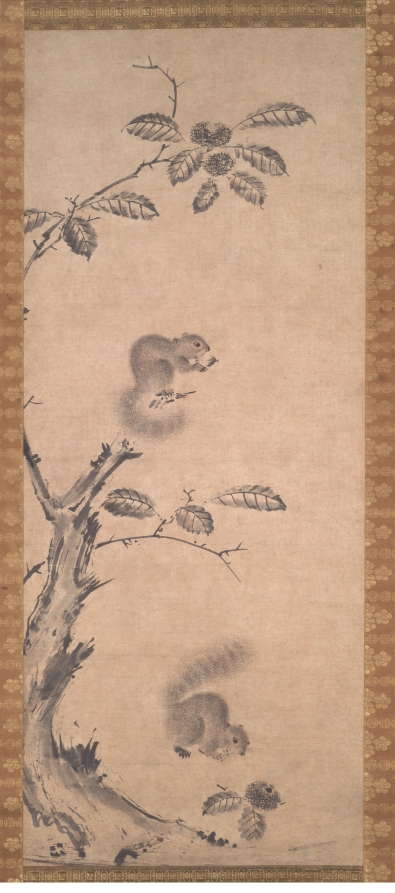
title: Squirrels on the Chestnut Tree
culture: China, Yuan dynasty (1271-1368)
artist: Ge Shuying (Chinese, active 1300s)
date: 1300s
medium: Hanging scroll; ink on paper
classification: Painting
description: One squirrel perches on a branch nibbling a chestnut, while the other on ground is approaching a fallen chestnut. The painter used fine, short staccato strokes to simulate the animal’s soft fur, while the tree is depicted with broader wet strokes in a rougher manner. Ge Shuying is known for his depictions of squirrels in a monochrome style characterized by crisp, decisive brushstrokes. He may have been a Chan (Zen) priest-painter, or perhaps a Daoist painter, active in the Hangzhou region of eastern China. From there his works spread to Japan, where squirrel paintings gained the attention of Japanese collectors.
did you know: Dr. Ju-hsi Chou argues that Yongtian and Songtian were different, but related (father-son, master-pupil, or brothers) painters of squirrels. Ge was apparently their family name. A Tokyo National Museum squirrel painting signed Songtian Shanren (松田山人) has a seal giving the artist's formal name as Ge Shuying (葛淑英).